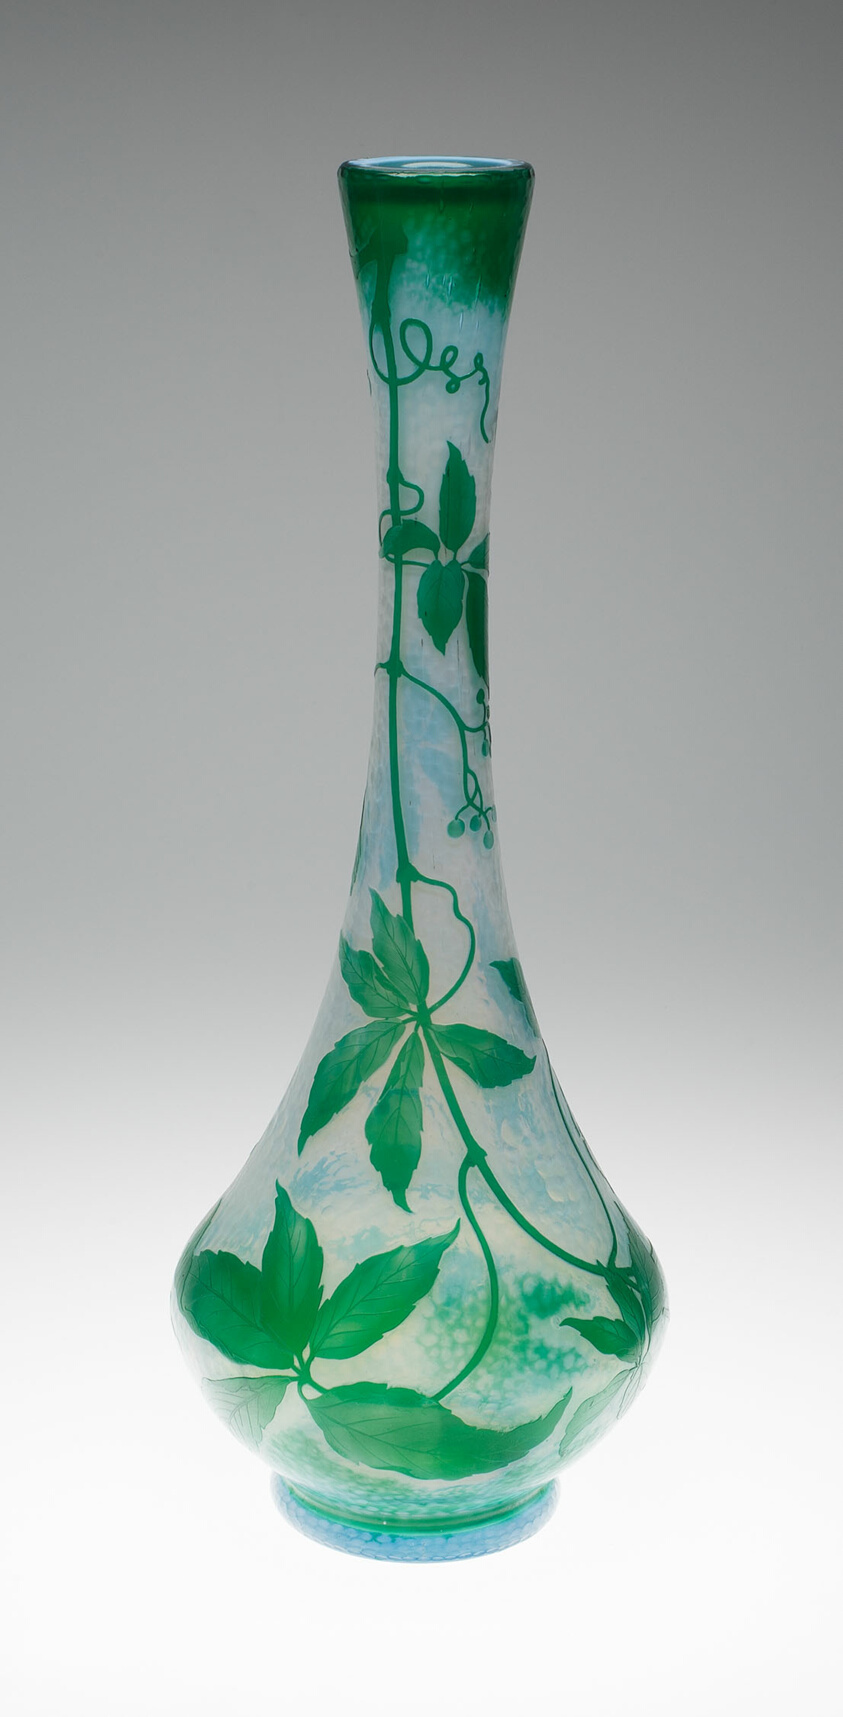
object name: Glass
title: Vase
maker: Nancy Daum Glassworks (French, founded 1875); France,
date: c. 1895/1900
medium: Glass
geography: France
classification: vase; vessel; glass; european decorative arts